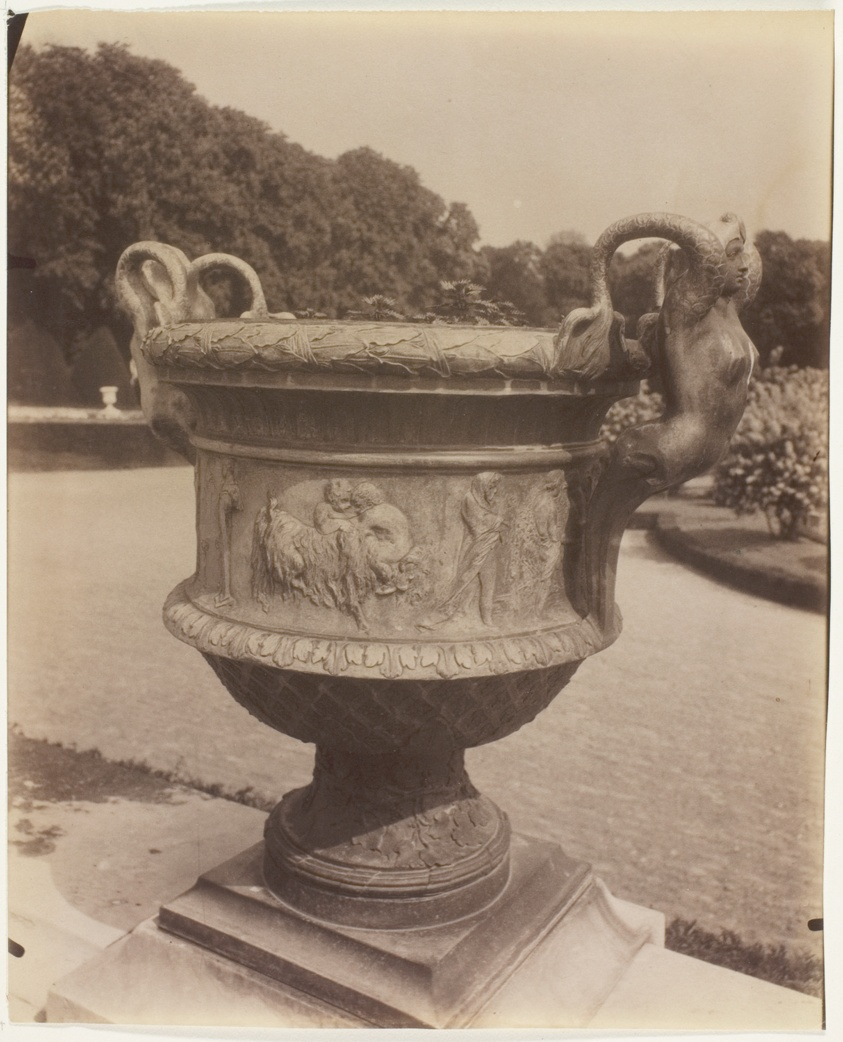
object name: Photograph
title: Versailles, Vase par Ballin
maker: Jean-Eugène-Auguste Atget (French, 1857–1927)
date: 1905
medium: Albumen print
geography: France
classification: albumen silver print; photographic process; photography; photograph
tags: Collected by Hugh Edwards